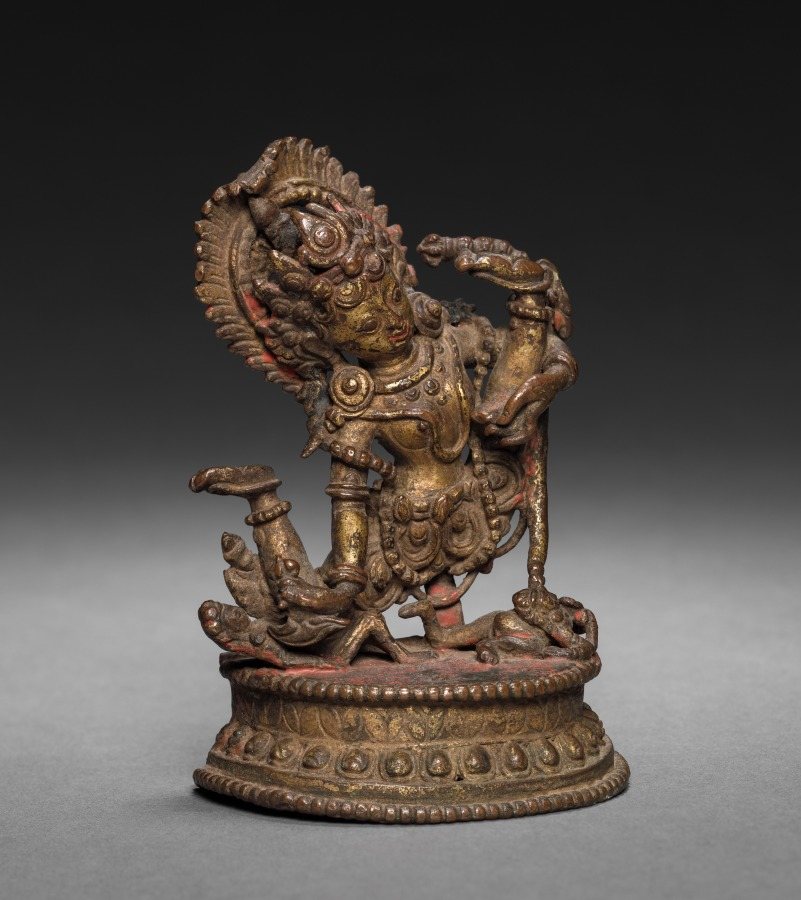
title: Achala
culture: Nepal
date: 1500s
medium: brass or bronze; turquoise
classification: Sculpture